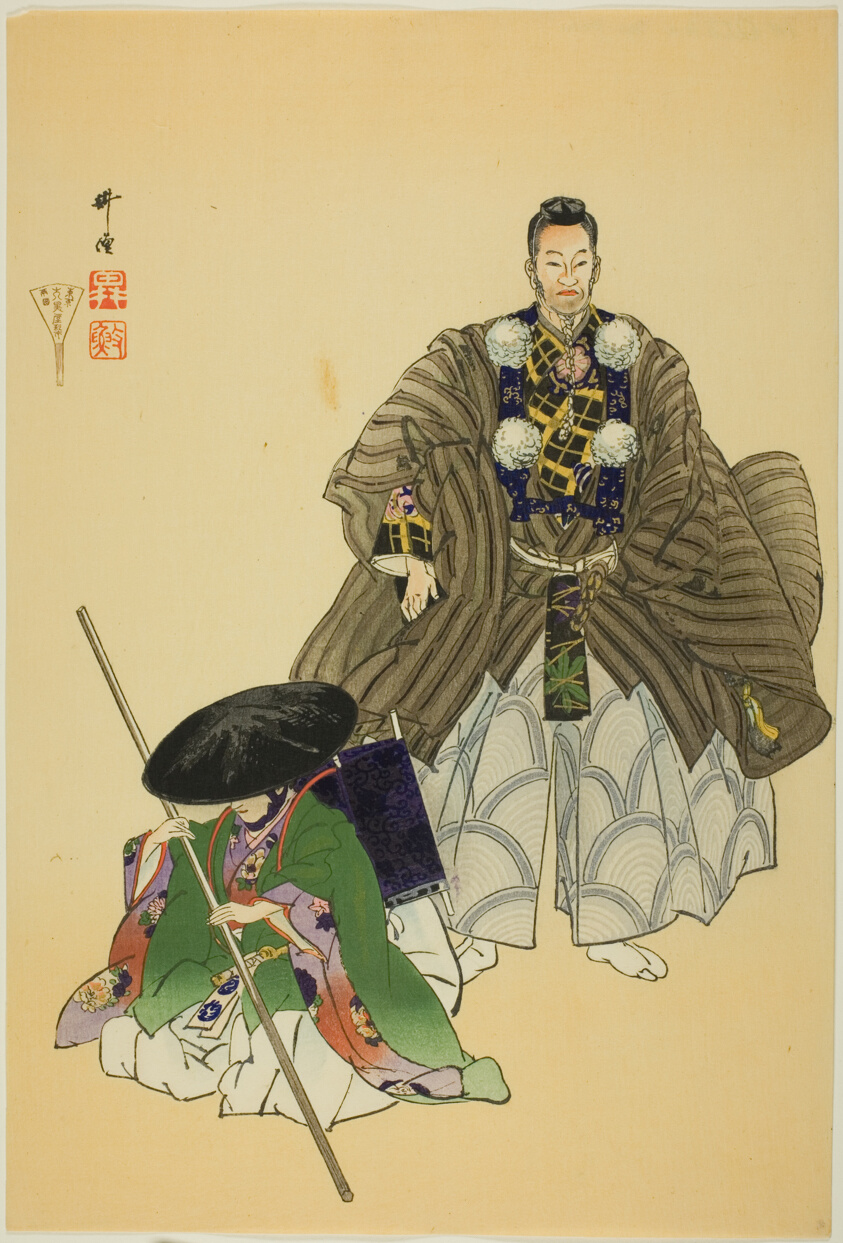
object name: Print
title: Ataka, from the series "One Hundred No Dramas (Nogaku hyakuban)"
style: Japanese (culture or style)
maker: Tsukioka Kogyo; Japanese, 1869-1927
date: 1898/1903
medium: Color woodblock print; left sheet of oban diptych (right: 1943.833.14b)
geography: Japan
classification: woodblock print; print; asian art